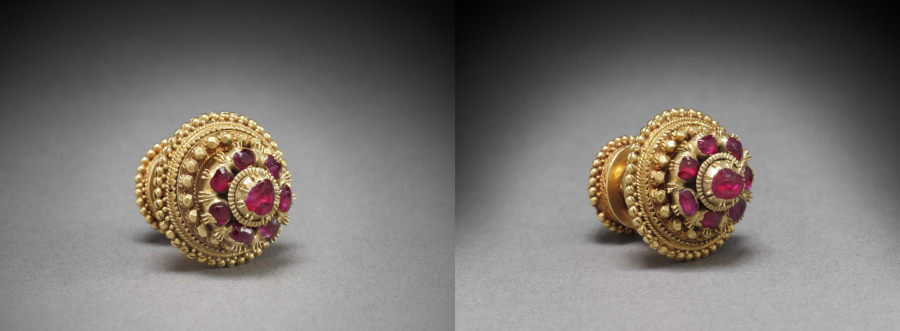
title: Pair of Ear Studs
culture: Burma (?)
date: 1800s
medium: gold and rubies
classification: Jewelry